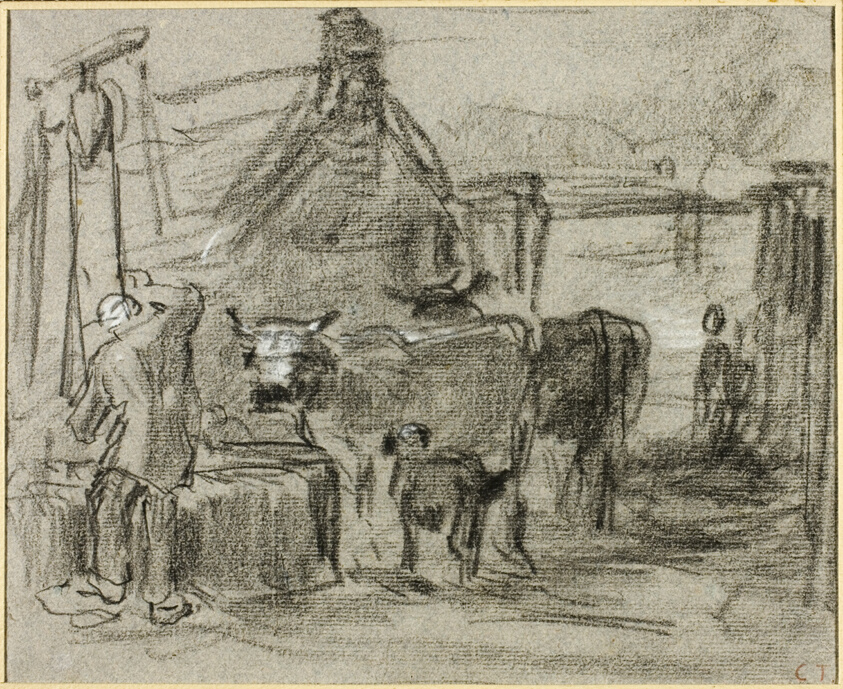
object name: Drawing and Watercolor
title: Farmyard with Man and Cattle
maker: Constant Troyon (French, 1810-1865)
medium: Black chalk, heightened with touches of white chalk, on blue laid paper with pink and blue fibers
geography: France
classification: chalk; drawings (visual works); prints and drawing